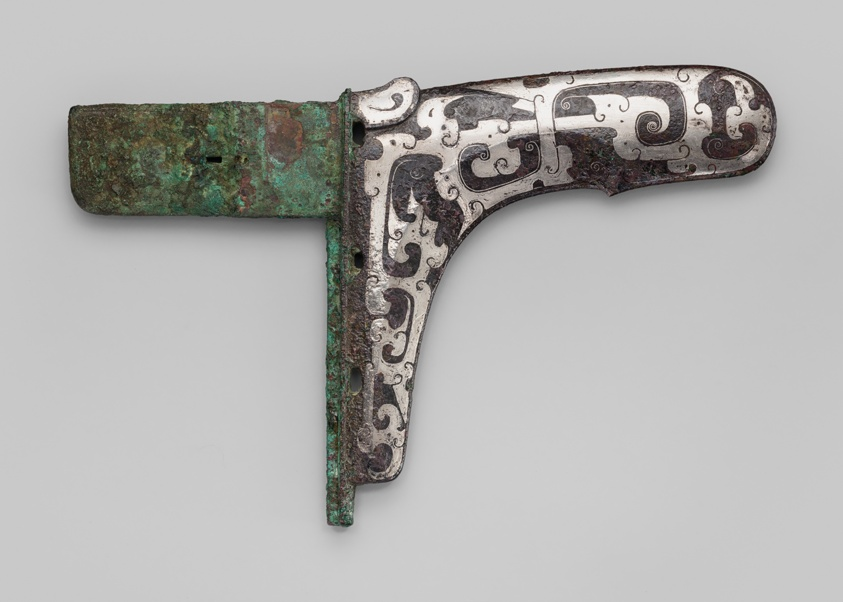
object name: Decorative Arts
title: Dagger-Axe (Ge)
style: Chinese (culture or style)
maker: China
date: Eastern Zhou dynasty, Warring States period (480–221 B.C.)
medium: Bronze inlaid with silver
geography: China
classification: bronze; metal; weapon; asian art; decorative arts